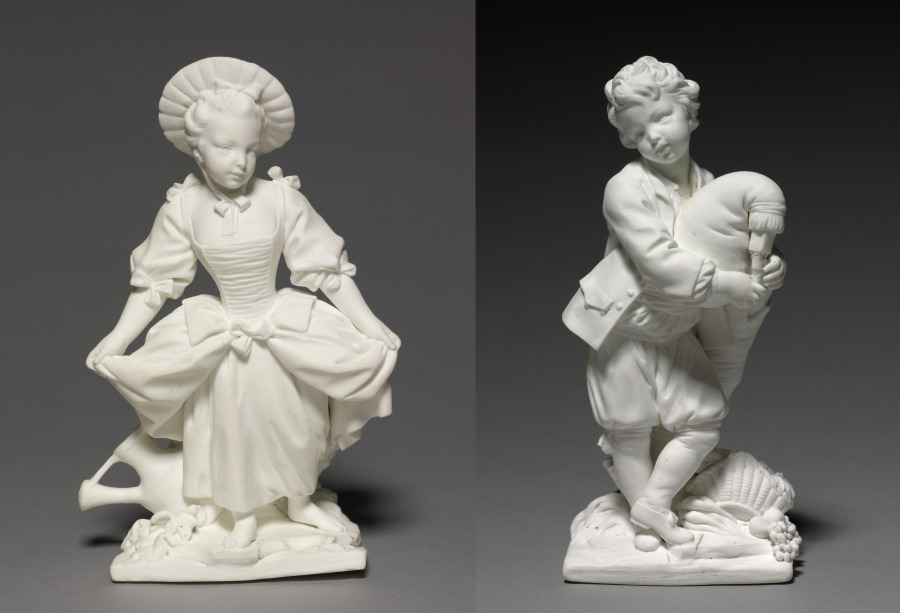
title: Figure Pair of the Dancer (La Danseuse) and the Bagpiper (Le Joueur de Musette)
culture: France, Vincennes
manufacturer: Vincennes Porcelain Factory (France, 1740–56)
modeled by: Pierre Blondeau (French)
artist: after a design by François Boucher (French, 1703–1770)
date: 1748–52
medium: unglazed soft-paste porcelain (biscuit porcelain)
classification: Ceramic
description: In the mid-18th century, the designs of reputed painter François Boucher were regularly reproduced at the Vincennes factory as figures or paintings on porcelain. A series of eight children designed by Boucher were referred to in factory records as the Enfants de Boucher (children of Boucher) and regularly reproduced. The depictions of these barefoot children in peasant attire engaged in pastoral pursuits represent the virtuous simplicity the 18th-century French elite ascribed to representations of rural life.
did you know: Unglazed porcelain figures were a long-lasting alternative to the decorative sugar sculptures displayed alongside intricately designed 18th-century French dinner services.